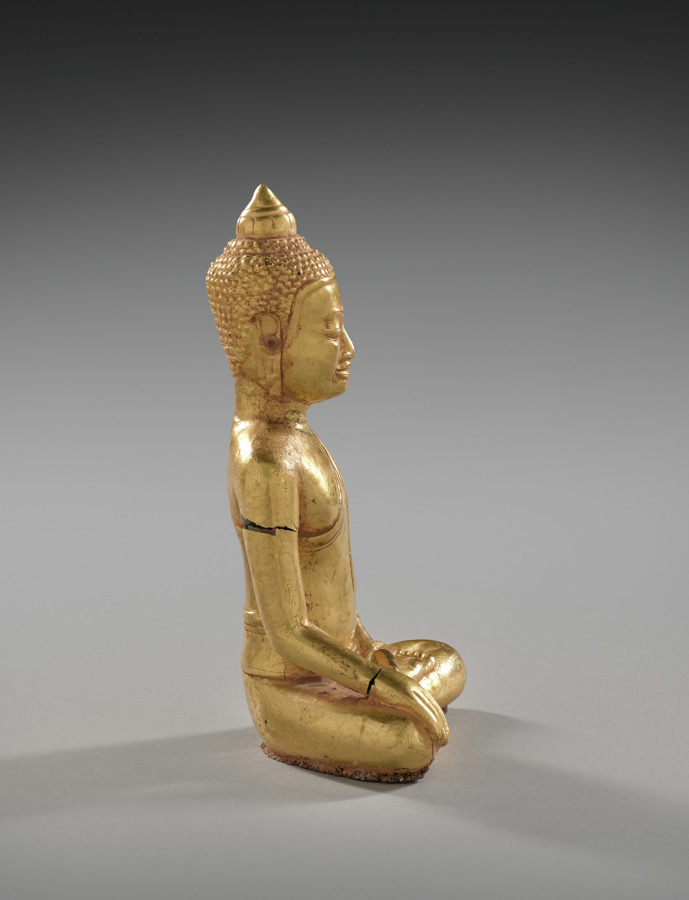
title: Seated Buddha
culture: Thailand, Ayutthaya, Wat Ratchaburana, 14th century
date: before 1424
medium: gold with resin core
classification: Sculpture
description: This pristinely modeled Buddha was fashioned from a sheet of 24-karat gold, using the repoussé (hammering) technique. The figure is filled inside with a resin core. The style is typical of the last phase of Khmer art (800s–1400s), the Lapburi style, which combines characteristics of both Cambodian and Thai sculptural styles.